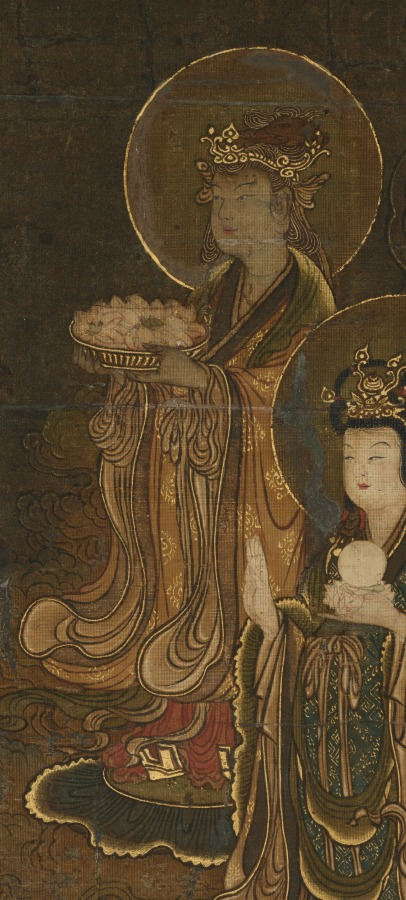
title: Descent of the Nine Luminaries and the Seven Stars at Kasuga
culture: Japan, Nanbokuchō period (1336–92)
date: mid- to late 1300s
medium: Hanging scroll; ink, color, gold and cut gold on silk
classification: Painting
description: This medieval religious painting shows celestial beings descending from the heavens into the Kasuga Shrine, a major religious site in Japan's ancient capital, Nara. The moon and the Kasuga mountain range appear in the uppermost portion of the painting, as does a red shrine entrance gate, or torii. In the upper part of the painting, figural representations of the stars in the constellation known as the Big Dipper in the West descend from right to left on cloud banks. In the lower part, the Nine Luminaries (Sanskrit: Navagraha) that emerged from the Vedic tradition—the sun and moon; the planets Jupiter, Mars, Saturn, Venus, and Mercury; and personifications of the fluctuating lunar nodes—descend in similar fashion. The painting uses the "deities in descent" scheme originating in China, as well as the original Buddhist form mandala (Japanese: honjibutsu mandarazu) format prevalent in medieval Japanese Shinto-Buddhist painting, to generate an image connected to the worship of celestial bodies in Esoteric Buddhism.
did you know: A 19th-century copy of this painting in ink and light color exists at the Kyoto City University of Arts.